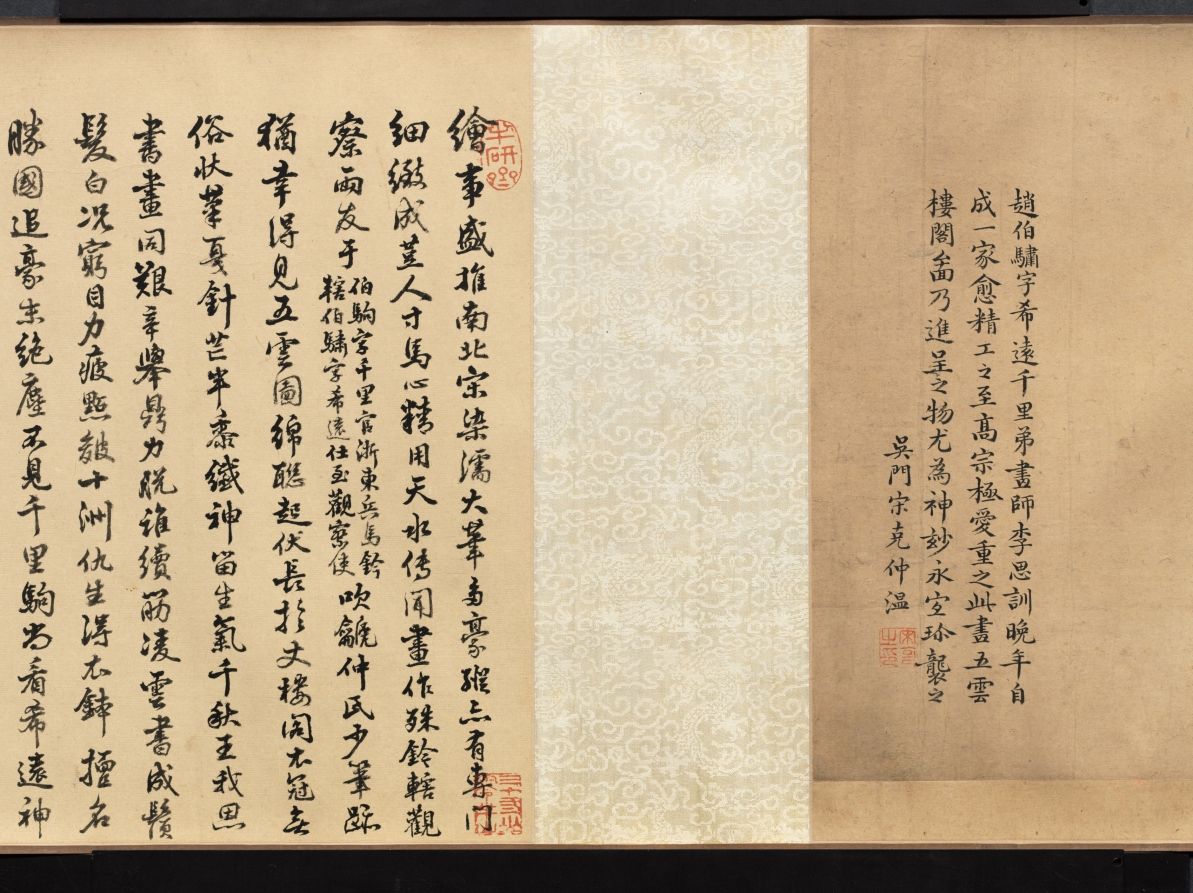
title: Landscape, The Palace of the Clouds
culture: China, Qing dynasty (1644-1911)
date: 1644–1911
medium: handscroll, ink on silk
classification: Painting